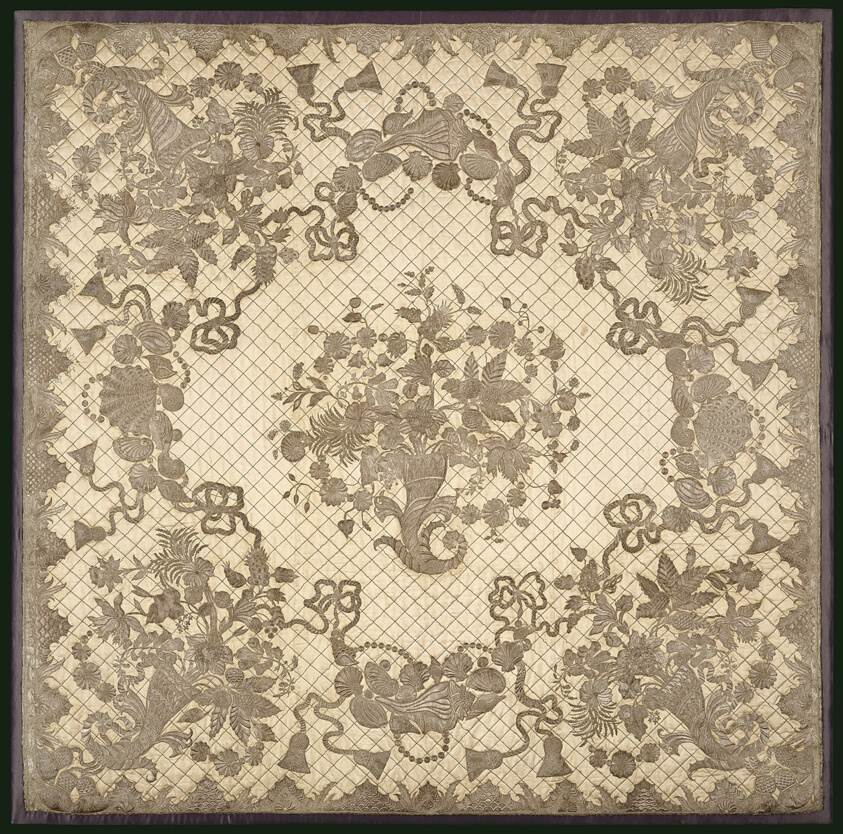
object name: Textile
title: Bedcover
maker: England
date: c. 1720/40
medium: Silk, warp-float faced 7:1 satin weave; embroidered with silk, silvered-metal-strip-wrapped silk, and coils of silver-metal strips; laid work, couching, and padded couching with silk-wrapped bast fiber and paper forms; wool fiber batting; backed with linen, plain weave; three widths joined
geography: England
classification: textile; needlework (visual works)